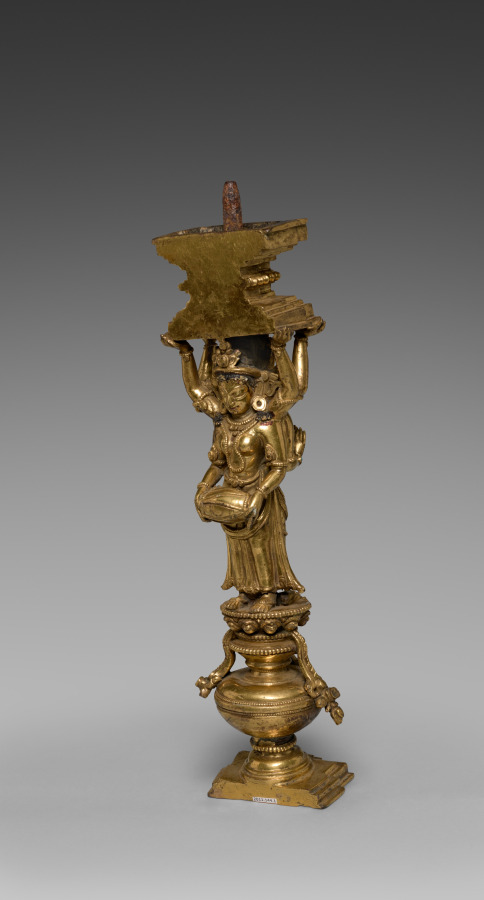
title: Support with Addorsed Figures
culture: Tibet, Densatil Monastery, 15th century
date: 1400s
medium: gilt bronze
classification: Sculpture